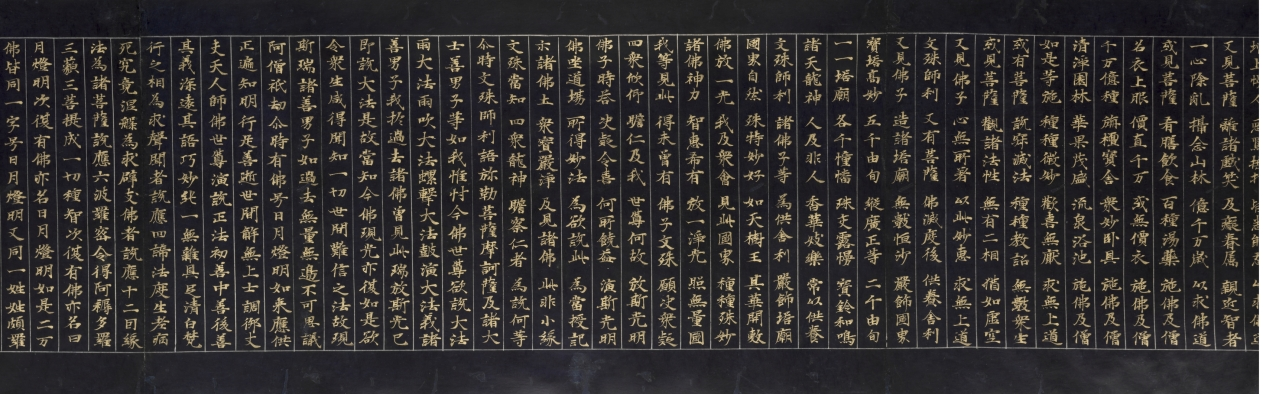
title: Lotus Sutra with a Frontispiece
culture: China, Song dynasty (960–1279)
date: late 1100s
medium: handscroll; gold ink on indigo sutra paper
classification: Painting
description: The frontispiece of this sutra, a sacred Buddhist scripture, illustrates episodes mentioned in the Buddha’s teaching. The sutra begins with a description of the historic Buddha Shakyamuni’s assembly on Vulture Peak. On the right, the Buddha sits amid members of his congregation: lohans (or arhats), bodhisattvas, gods, and other beings. The narrative proceeds from right to left. Heavenly light emanates from Shakyamuni’s brow to “illuminate the eighteen thousand worlds to the east.” Illustrated immediately below the ray is the sutra’s promise that if anyone carves or paints images of the Buddha “they will achieve the Buddha path.” The female figures in the frontispiece point to another promise made in this popular Mahayana school sutra, namely that female devotees and nuns who read the sutra are promised Buddhahood and salvation.